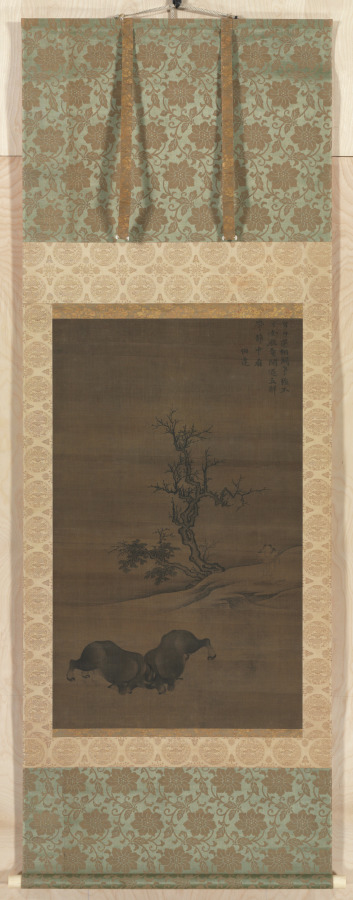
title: Herdboys and Buffalo in Landscape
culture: China, Qixian, Yuan dynasty (1271-1368)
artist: Guo Min (Chinese, mid-late 1200s)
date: 1200s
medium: Hanging scroll; ink on silk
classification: Painting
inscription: 努力還相鬪，爭強不自安。/ 牧童閑退立，解帶靜中看。/ 伯達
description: Herdboys tend their buffalo in a bucolic landscape by a winding stream. Guo Min emphasizes the massive forms and mighty power of the animals, transforming them into forces of nature. The poem on this scroll reads: "The bulls are engaging in fighting, Cautiously, each seeks to overcome the other. The herdboy calmly stands by. Untying his belt, he silently watches."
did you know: Tending water buffalos has traditionally been the task of young boys and can still be seen in rural areas of Southern China today.